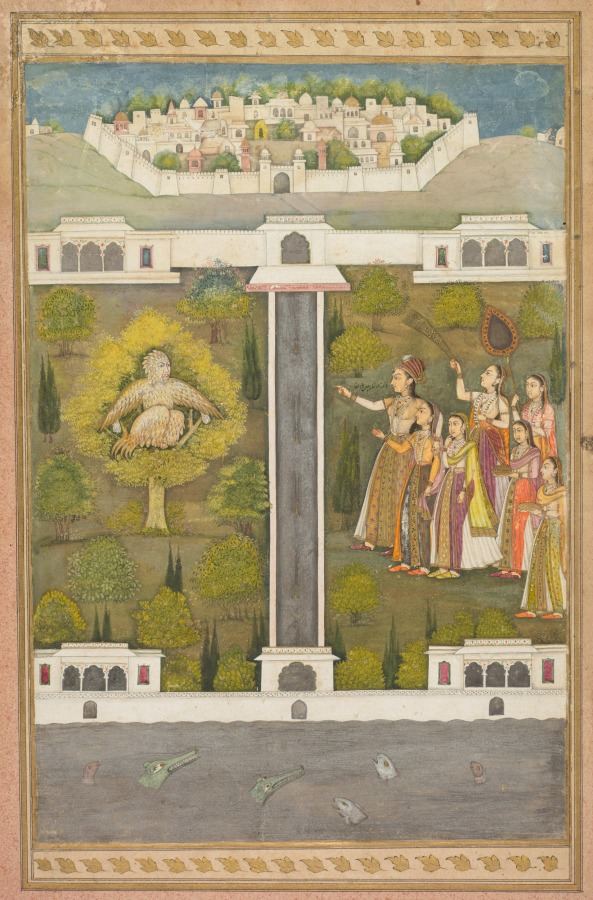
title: Mahliqa, Daughter of the Emperor of China, Pointing at the Bird-Man Khwaja Mubarak: A Leaf from a Poetical Romance Relating to Shah Alam I (recto)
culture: Mughal India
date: c. 1710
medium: Gum tempera and gold on paper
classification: Painting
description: A Persian inscription identifies the bird-man in the tree by name, but the text in which he appears remains unidentified. Also unknown is the Chinese princess Mahliqa (“she who has a face like the moon”), named in a Persian inscription written in front of her face. The artist depicts her in the dress of a Mughal court lady, except for the addition of an unusual headdress, and her handmaidens all look Indian. They gesture to the bird-man from the opposite side of a formal garden canal with fountains. A fortified city lies in the distance behind the walled garden, while creatures peer up at the fabulous composite figure from the water below.